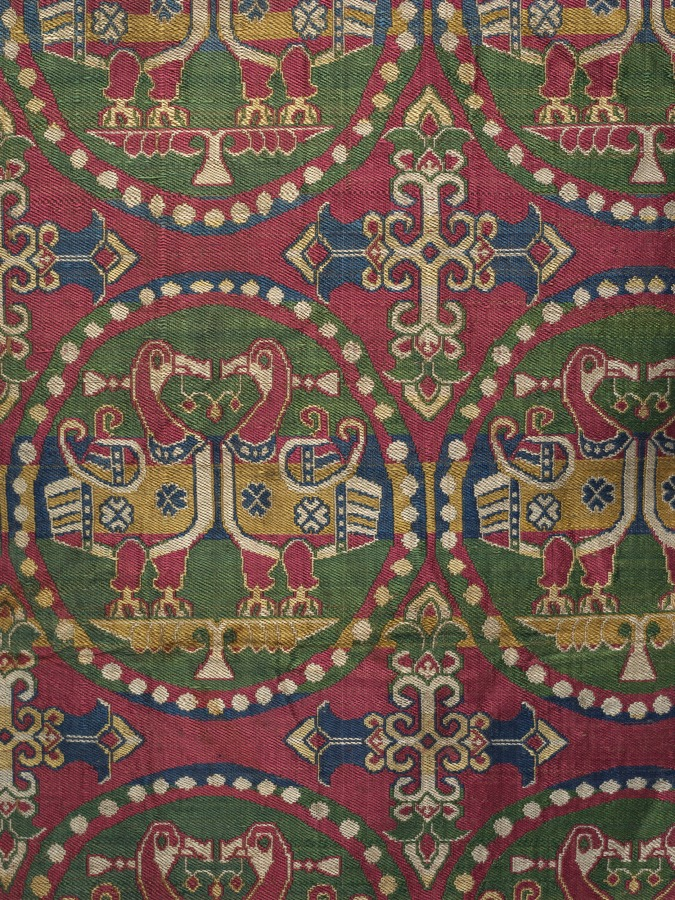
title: Child’s Coat with Ducks in Pearl Medallions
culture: Probably Sogdia (present-day Uzbekistan); China, Tang dynasty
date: 700s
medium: Silk: weft-faced compound twill weave (samite)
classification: Garment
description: The coat’s outer fabric is woven in five brilliant colors featuring paired ducks in pearl roundels, hallmarks of the precious and highly desired silks from Sogdia. The coat’s inner lining is a twill damask with a floral pattern made in China. The combination of Sogdian and Chinese silks in one garment with Tibetan ownership history is evidence of the vital exchange and cultural interaction among the peoples living along the trade routes of the Silk Road. This precious coat was presumably made for a Tibetan prince. Given the coat’s pristine condition, though, it is unclear whether the garment was ever worn, or was used as a diplomatic gift or perhaps as currency.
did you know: This coat is part of a set of garments that originally included an outer pair of pants and silk boots made from the same fabric.